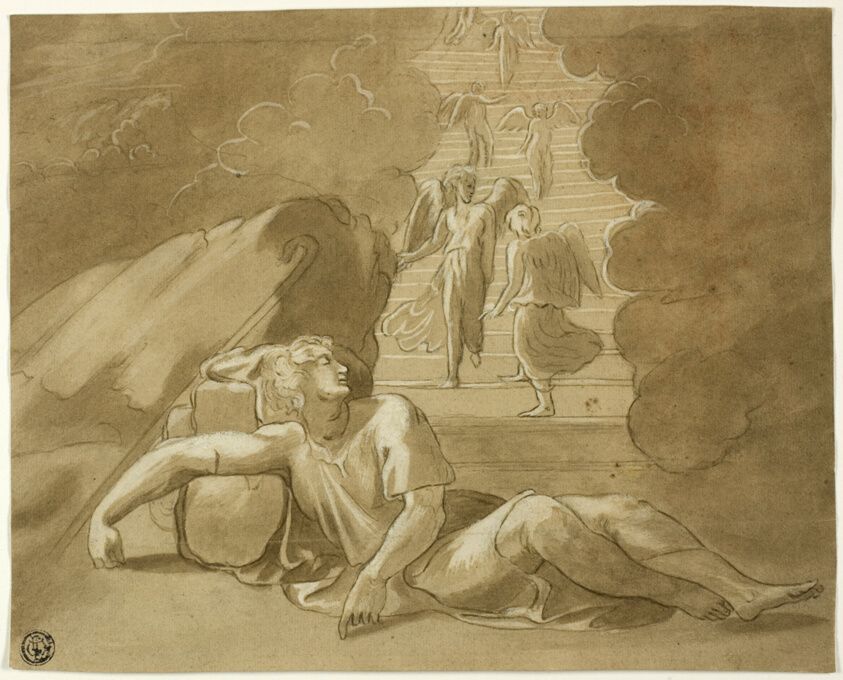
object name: Drawing and Watercolor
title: Jacob's Dream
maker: Unknown artist; after Niccolò Vicentino (Italian, active c. 1540-1550); after Raffaello Sanzio, called Raphael (Italian, 1483-1520)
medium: Pen and brown ink and brush and brown wash, heightened with lead white, on tan laid paper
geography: Italy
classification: ink with wash; drawings (visual works); prints and drawing